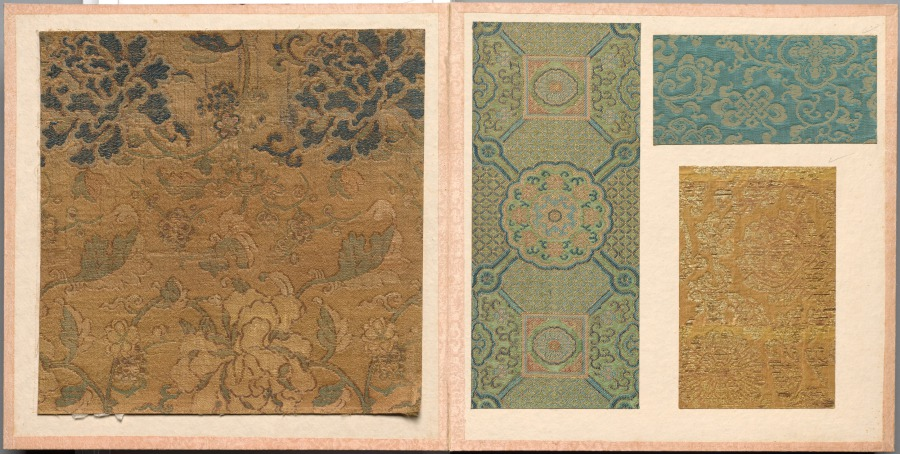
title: Album of Textile Samples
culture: Japan and China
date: 1700s–1800s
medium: silk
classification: Textile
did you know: This album contains 46 pages with 156 mounted Chinese or Japanese textile samples.